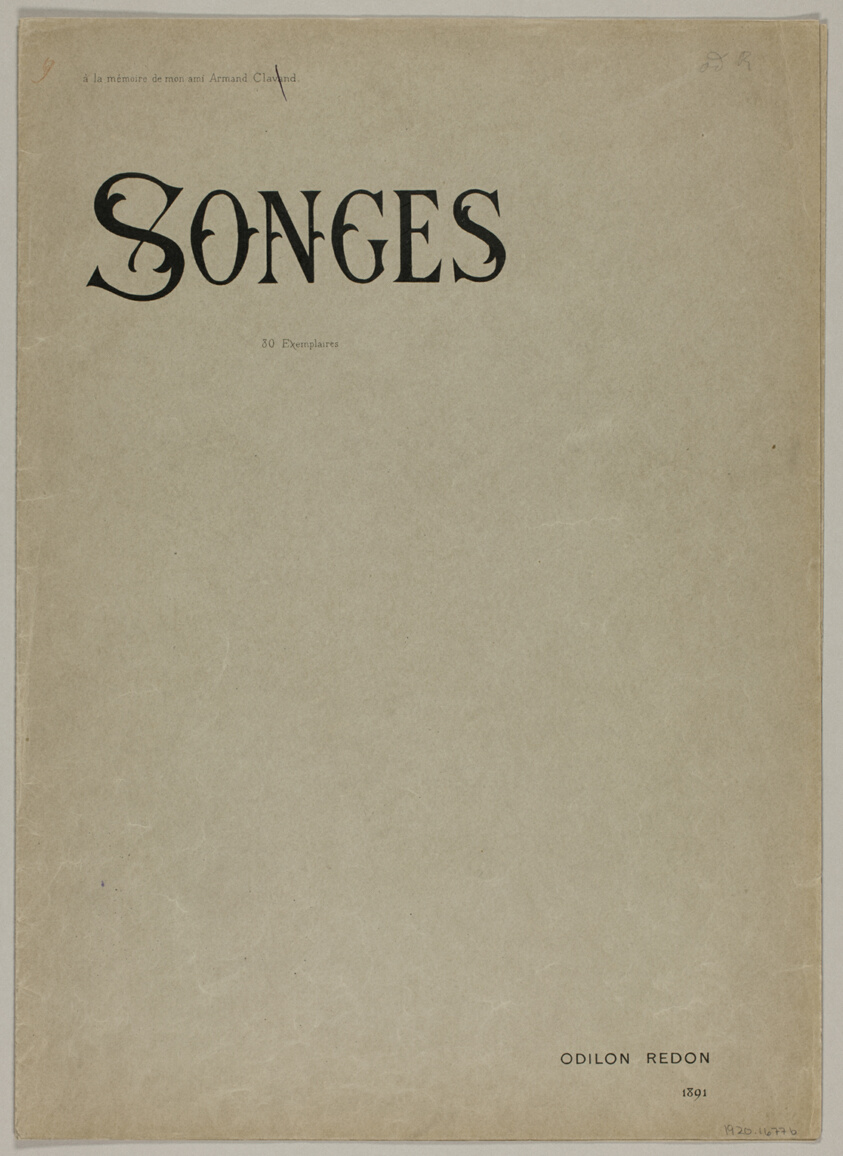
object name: Print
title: Portfolio Cover for Songes (Dreams)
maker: Odilon Redon (French, 1840-1916)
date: 1891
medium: Bi-fold lithographed portfolio cover printed in black on gray-green wove paper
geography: France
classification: lithograph; print; prints and drawing; paper